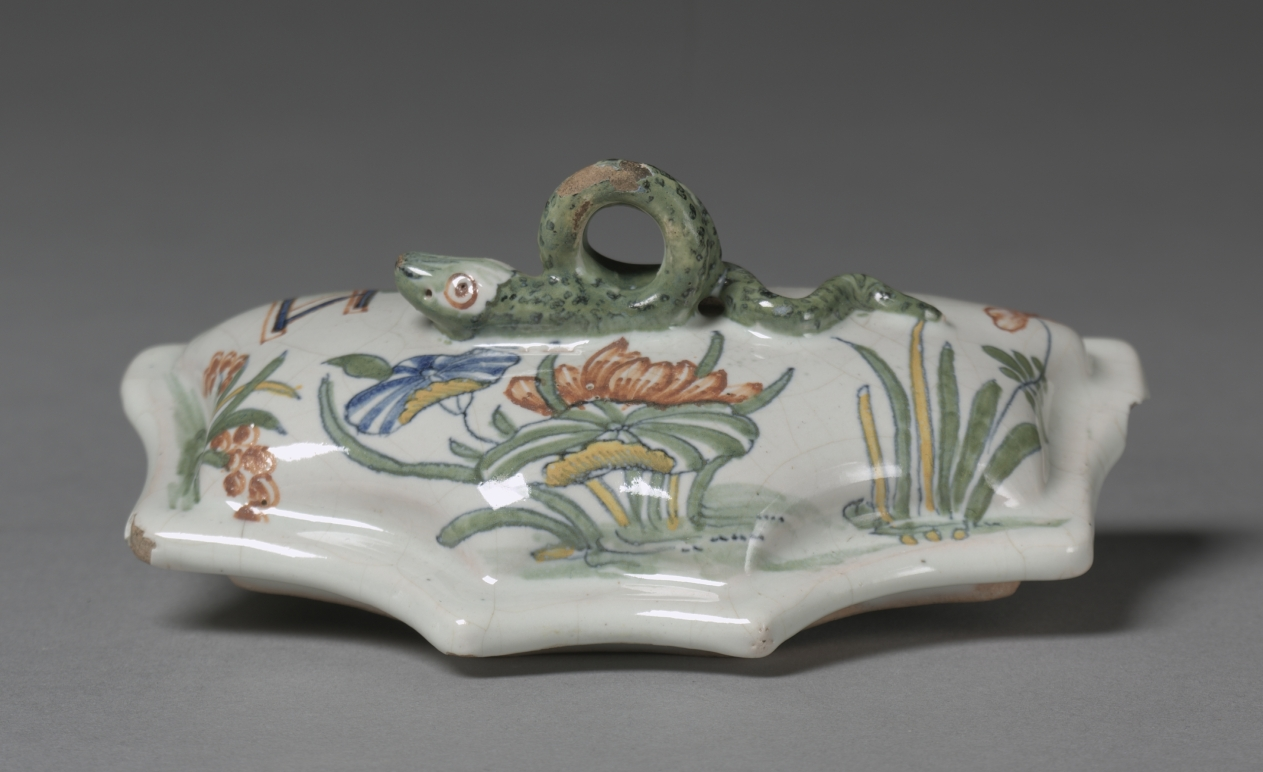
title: Writing Stand with Inkwells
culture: France, Sinceny, 18th century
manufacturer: Sinceny Factory (French)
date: 1746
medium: Tin-glazed earthenware (faience) with enamel decoration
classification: Ceramic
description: The faience factory at Sinceny was an offshoot of that at Rouen. In style, Sinceny closely resembles later Rouen wares with polychrome decoration. The stylized flowers and insects which decorate this writing stand are entirely typical of Sinceny faience.